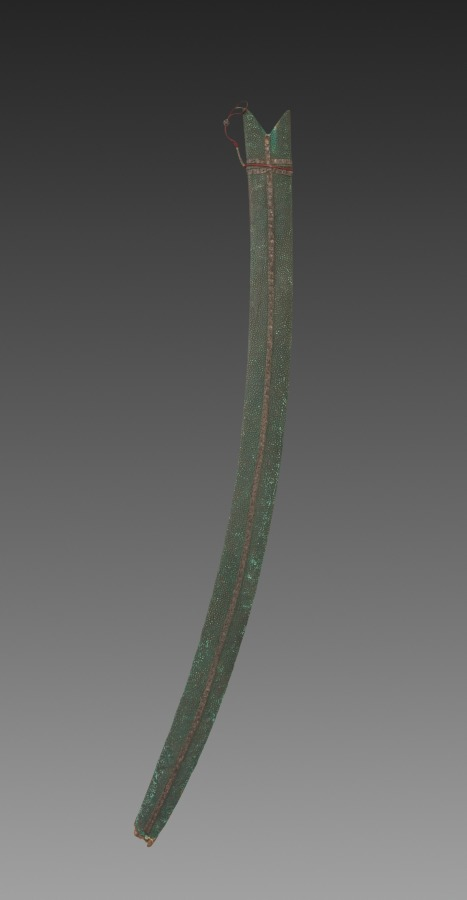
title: Silapa Sword (green leather case)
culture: India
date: 1700s–1800s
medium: Green leather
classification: Arms and Armor